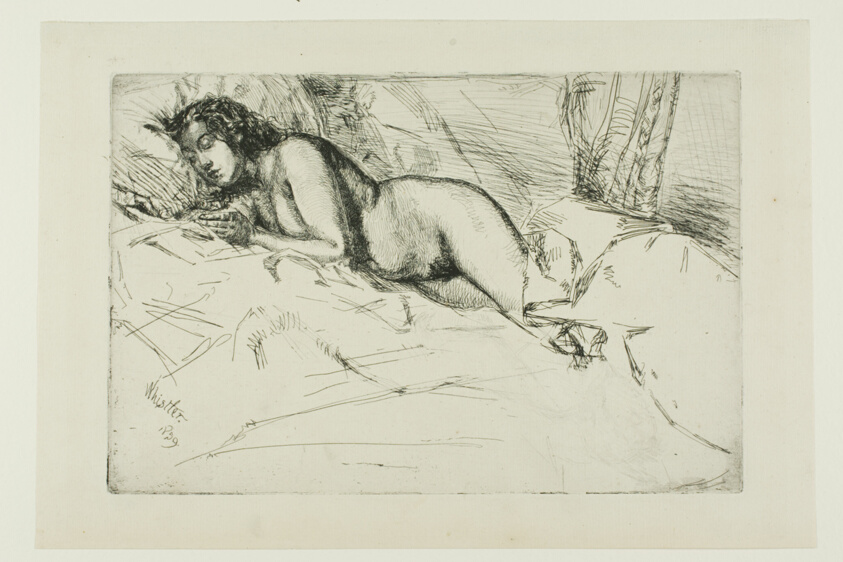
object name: Print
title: Venus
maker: James McNeill Whistler (American, 1834-1903)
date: 1859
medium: Etching and drypoint with foul biting in black ink on cream laid paper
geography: United States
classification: etching; foul biting; print; prints and drawing; drypoint; paper